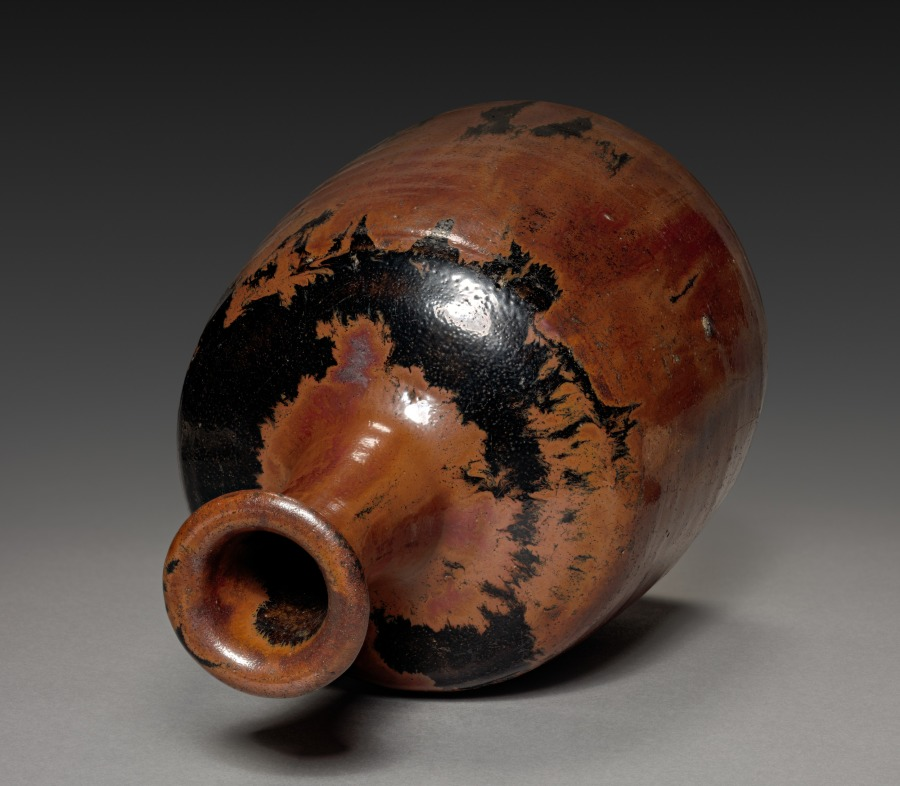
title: Bottle Vase: Seto Ware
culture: Japan, Momoyama period (1573-1615) to Edo period (1615-1858)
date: 1600–1650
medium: slip glazed stoneware (Mino or Seto ware)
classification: Ceramic